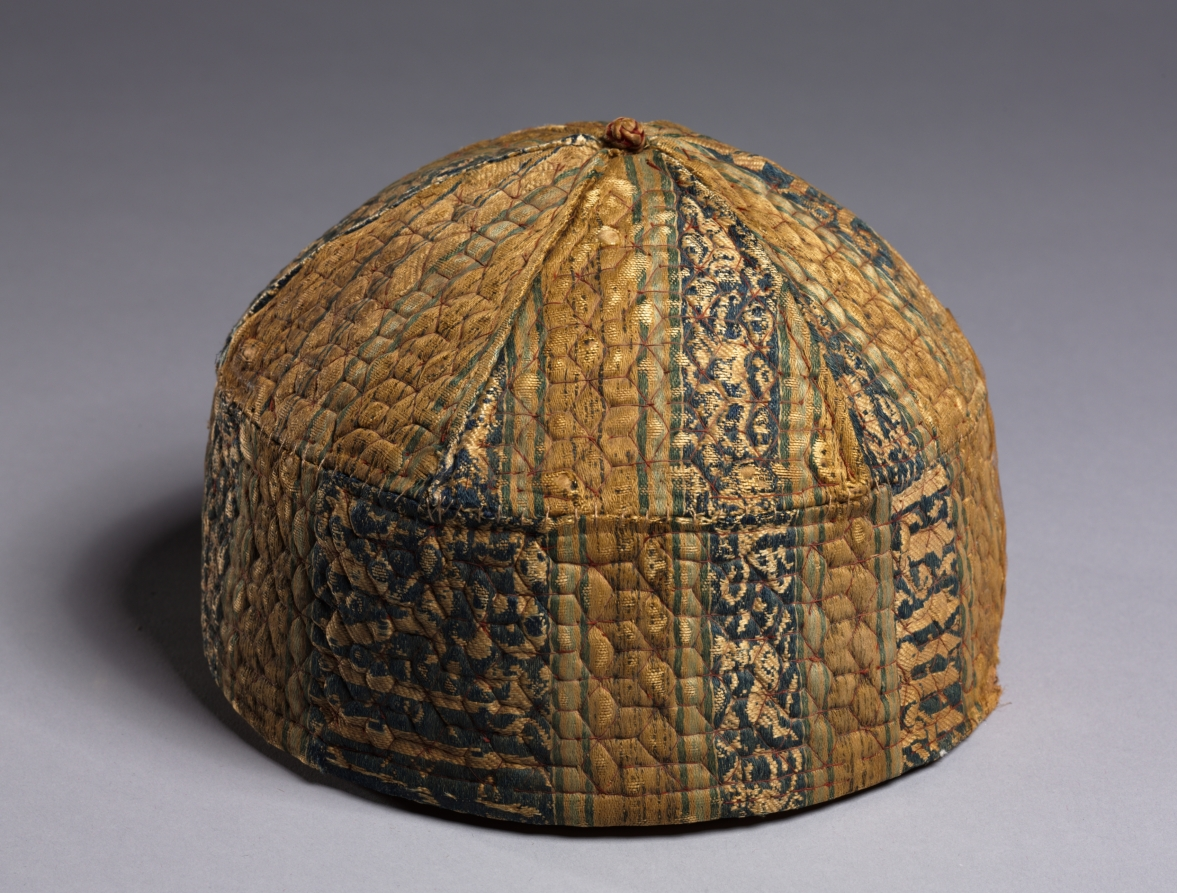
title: Cap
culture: Syria or Egypt, Mamluk Dynasty (1250–1517)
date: 1300s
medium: lampas, quilted: silk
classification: Textile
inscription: 1) Glory to our Lord, the Sultan 2) Glory to our Lord, the Sultan al-Malik, al-Nasir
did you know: The winter-weight quilted cap was part of a set with a matching quilted vest.